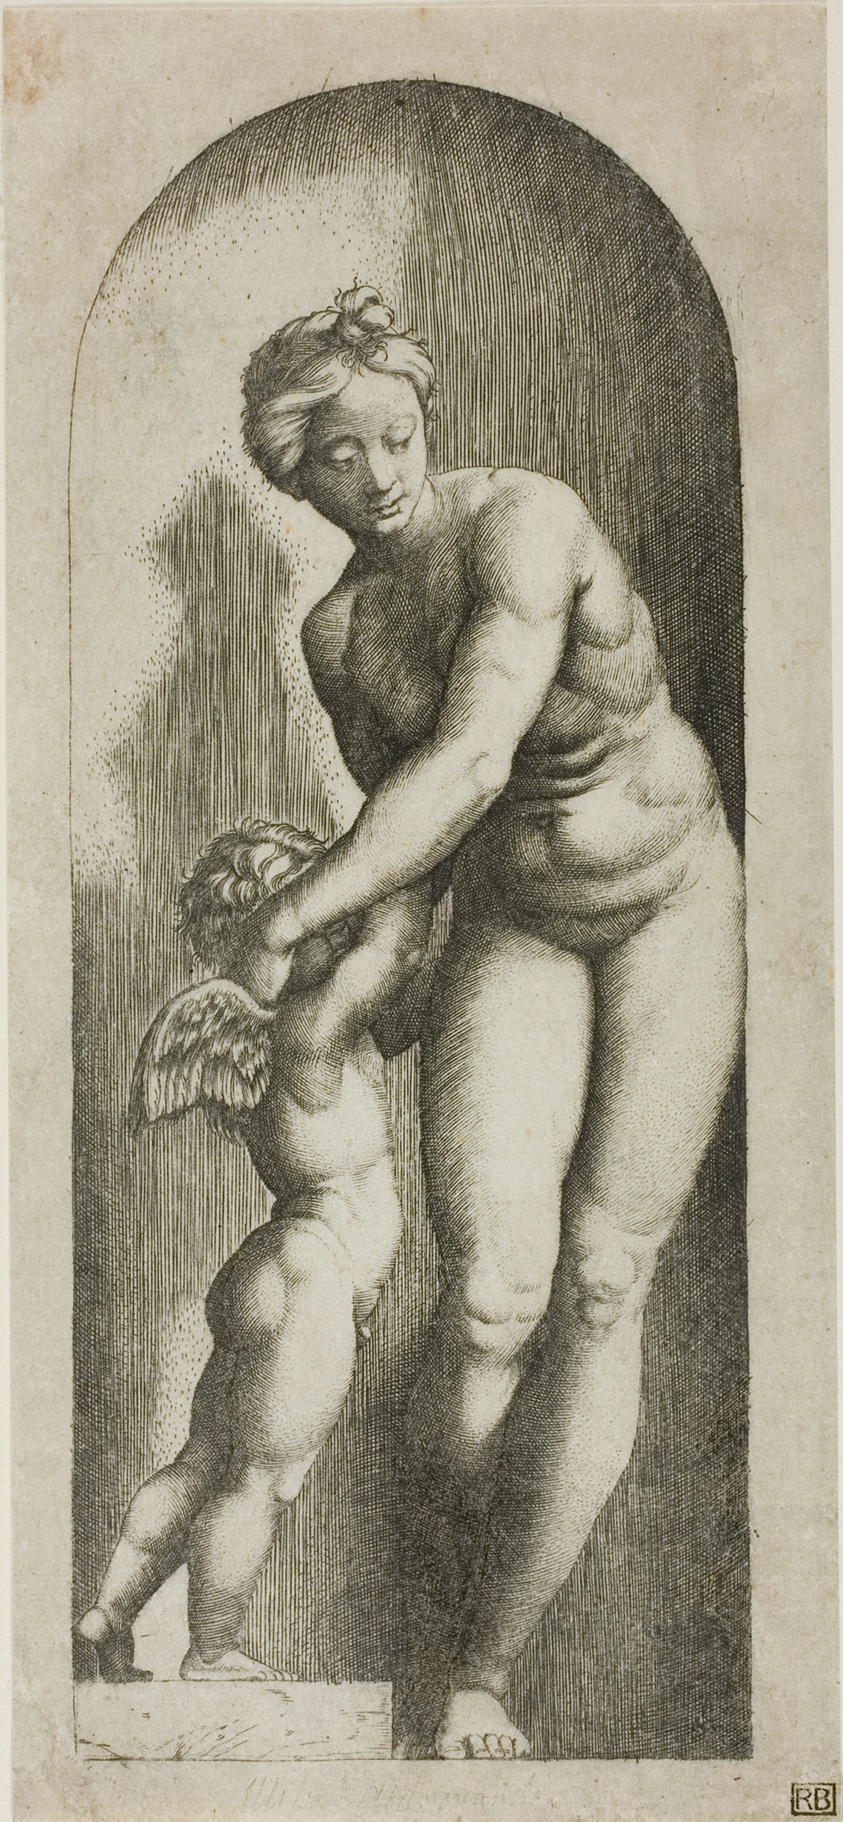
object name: Print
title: Venus and Cupid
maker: Marcantonio Raimondi (Italian, c. 1480-1534)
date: 1510/12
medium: Engraving printed in black on ivory laid paper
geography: Italy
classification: engraving; print; prints and drawing